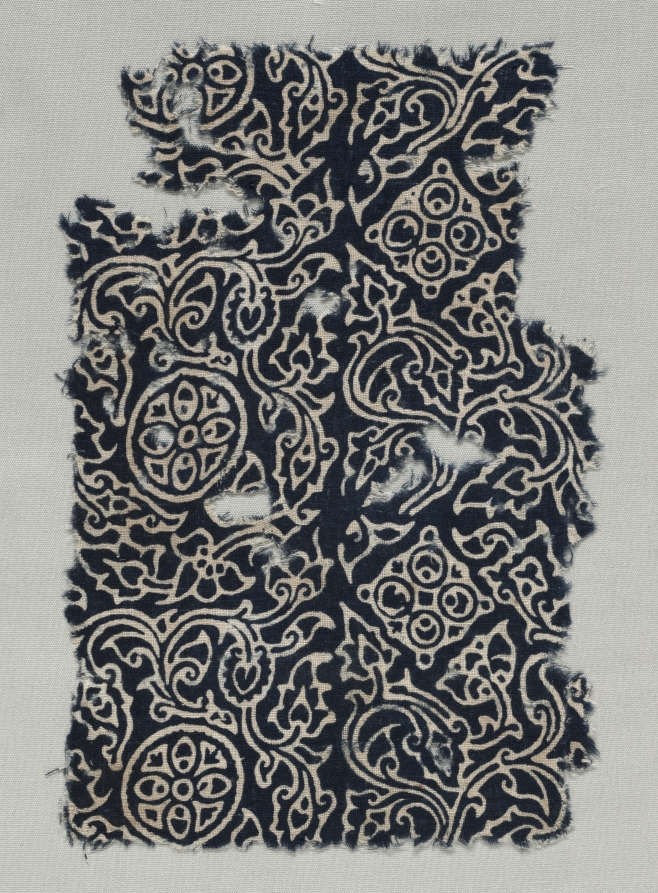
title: Fragment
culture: India, 15th century (?)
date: 1400s (?)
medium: stamped resist, dyed; cotton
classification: Textile